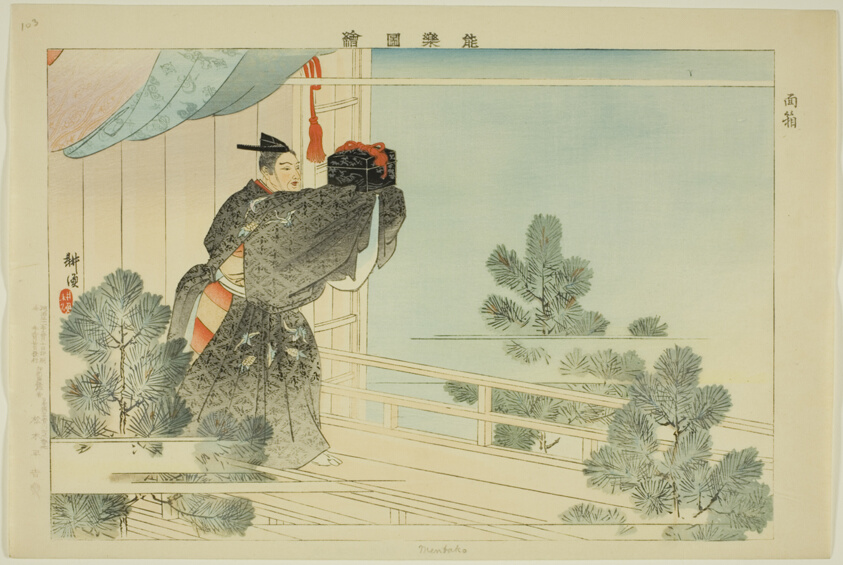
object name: Print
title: Mentako, from the series "Pictures of No Performances (Nogaku Zue)"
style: Japanese (culture or style)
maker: Tsukioka Kogyo; Japanese, 1869-1927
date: 1898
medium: Color woodblock print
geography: Japan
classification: woodblock print; print; asian art